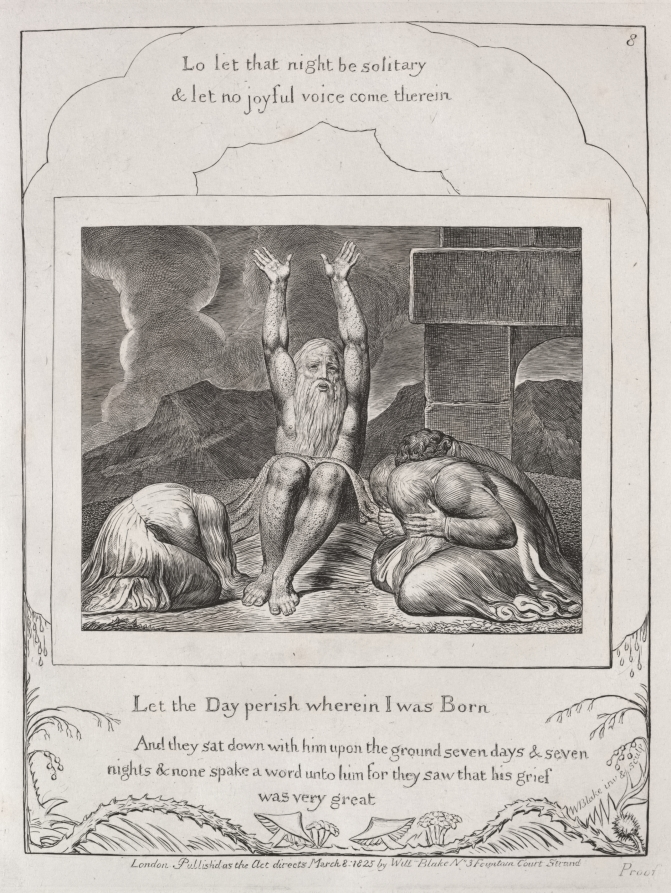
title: The Book of Job: No. 8, Let the Day perish wherin I was born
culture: England, 19th century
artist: William Blake (British, 1757–1827)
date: 1825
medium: engraving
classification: Print